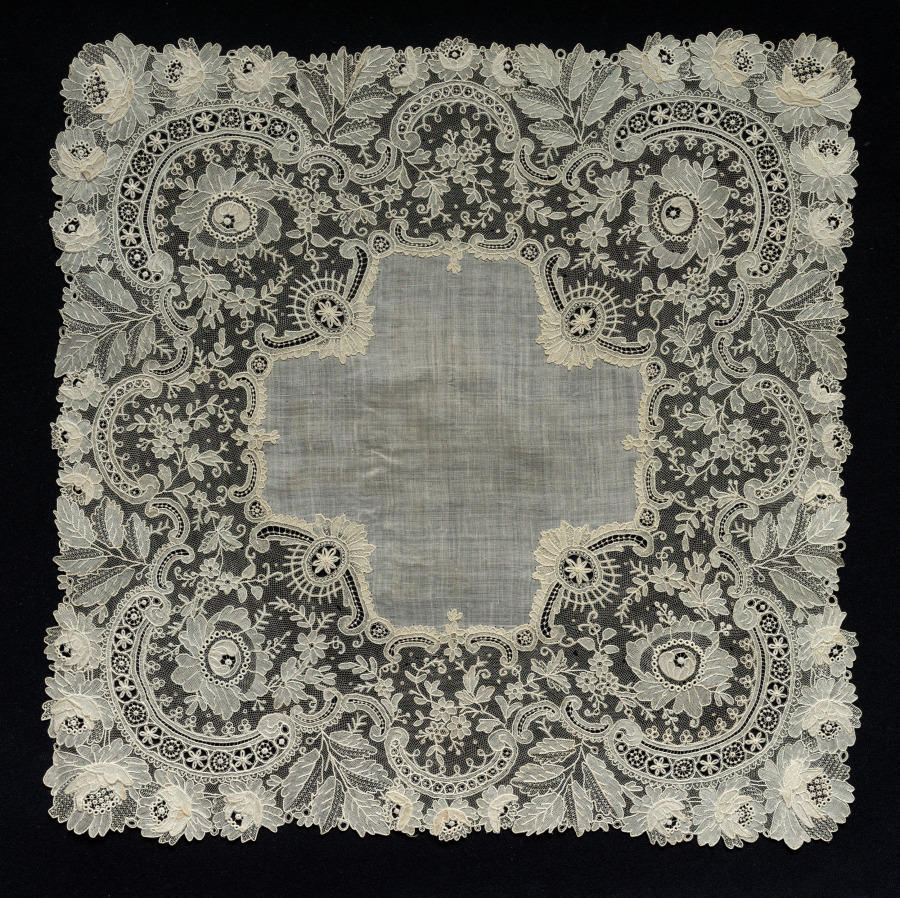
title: Lace Handkerchief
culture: Belgium, Brussels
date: 1800s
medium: Plain weave linen center; needle lace (point de gaze) border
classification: Lace